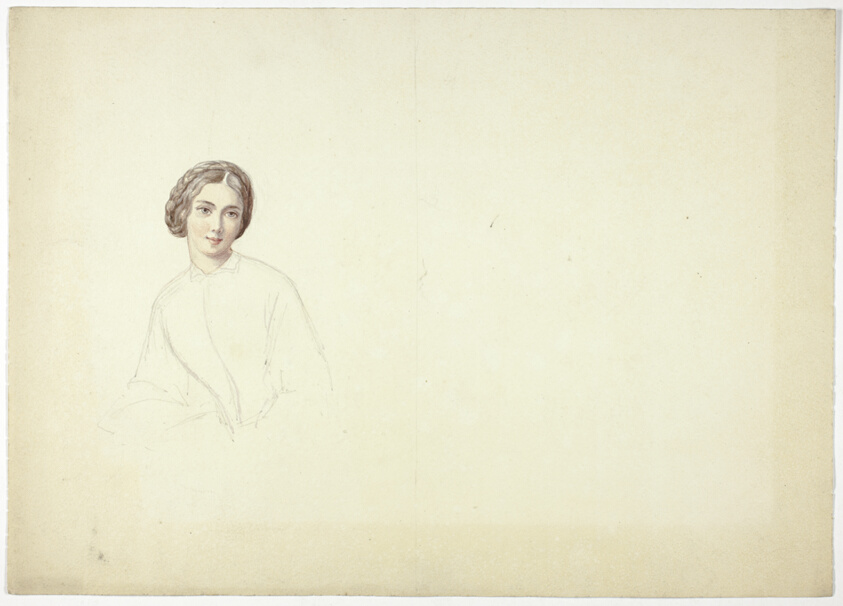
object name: Drawing and Watercolor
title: Study for Female Portrait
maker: Elizabeth Murray (English, c. 1815-1882)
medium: Watercolor over graphite on cream wove paper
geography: England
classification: watercolor; drawings (visual works); prints and drawing